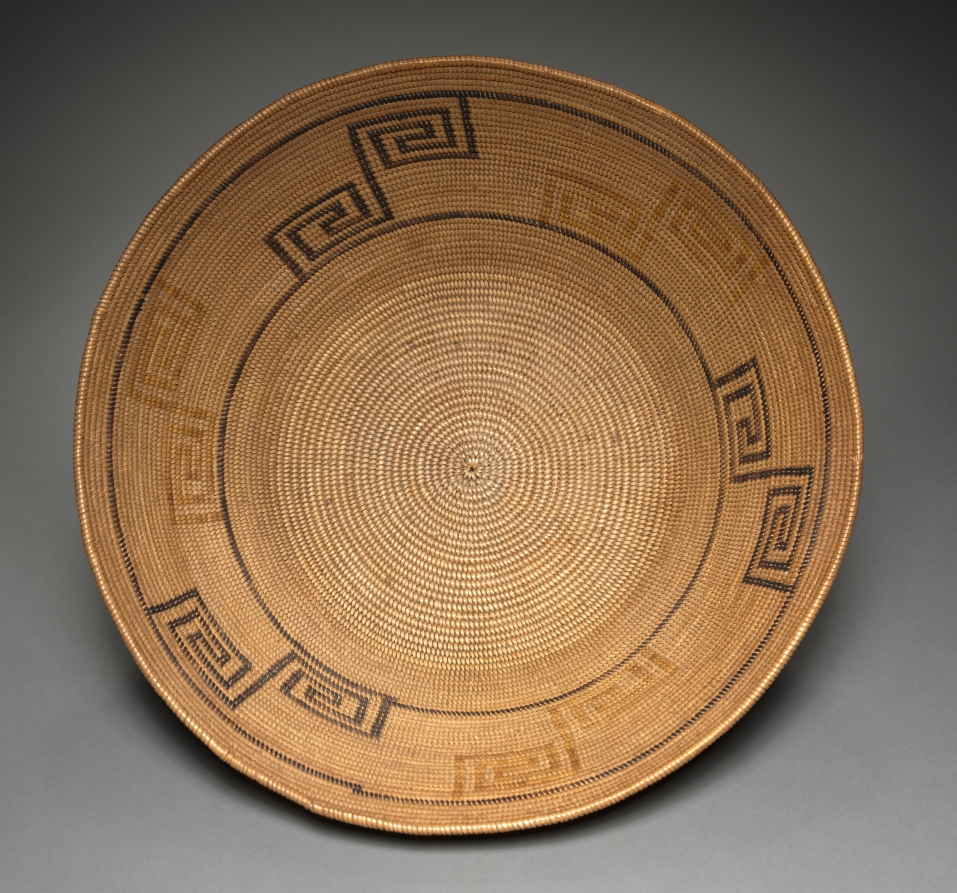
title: Food Bowl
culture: California, Mission, Late 19th- Early 20th century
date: c 1875– 1924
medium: coiled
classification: Basketry